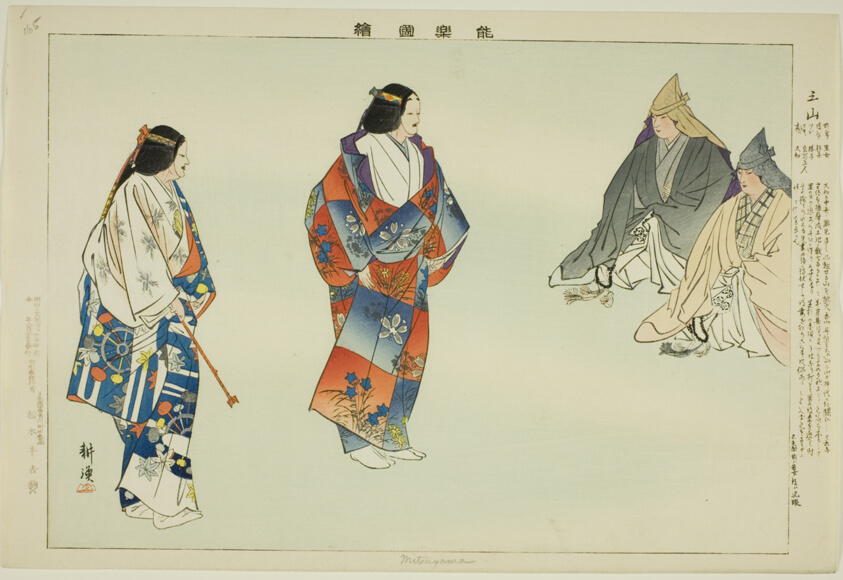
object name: Print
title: Mitsuyama, from the series "Pictures of No Performances (Nogaku Zue)"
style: Japanese (culture or style)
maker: Tsukioka Kogyo; Japanese, 1869-1927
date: 1898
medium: Color woodblock print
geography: Japan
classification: woodblock print; print; asian art